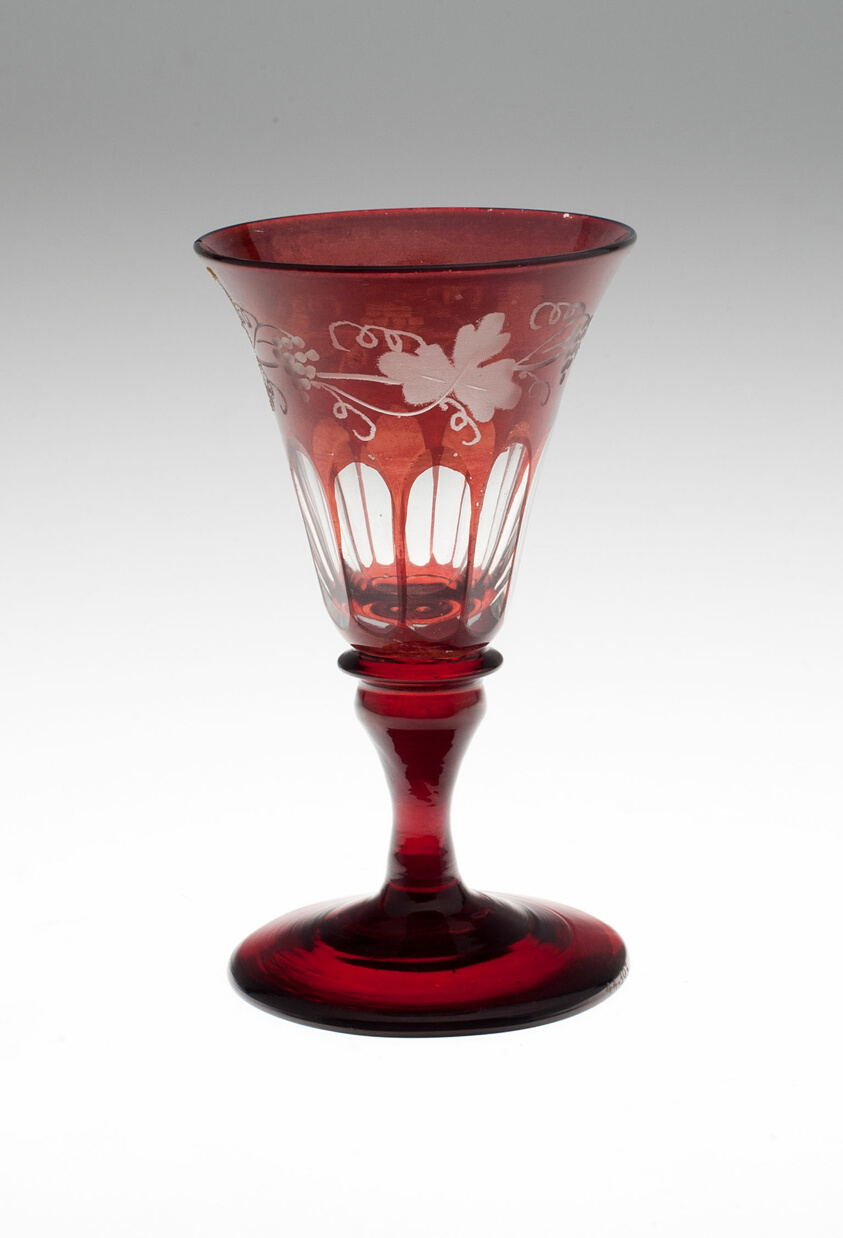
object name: Glass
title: Wine Glass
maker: Bohemia, Czech Republic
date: Mid to late 19th century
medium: Glass; blown, cut, stained red adn engraved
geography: Bohemia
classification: drinking vessel; glass (object genre); glass